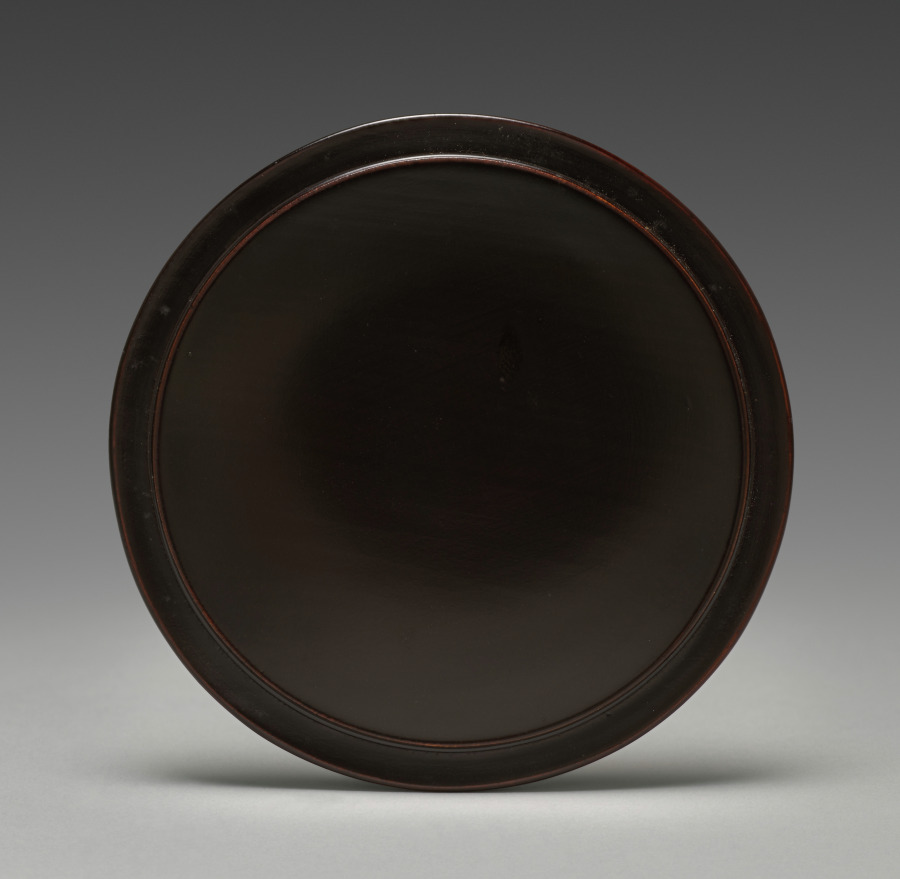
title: Lid for a Water Container with Shell and Seaweed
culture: Japan, Meiji period (1868–1912) or Taishō period (1912–26)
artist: Seifū Yohei IV (Japanese, 1872–1951)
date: 1914–46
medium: lacquered wood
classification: Ceramic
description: Yohei IV chose an aquatic theme for this mizusashi. He applied clay to the surface and molded the shape of a large conch on one side and, on the other, a clam and a scallop. The finer details he incised into the surface of his low-relief shapes. He then painted seaweed as though it were coming out from behind the sea creatures, and he further set off the animals using a masking technique with a gradated blue surround. Finally, he applied a translucent blue glaze, identified on the box as mizusai, over the entire body of the vessel. The resulting effect is that one imagines having descended through the water to the ocean floor.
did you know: A mizusashi, water container, is an essential utensil for a tea ceremony.